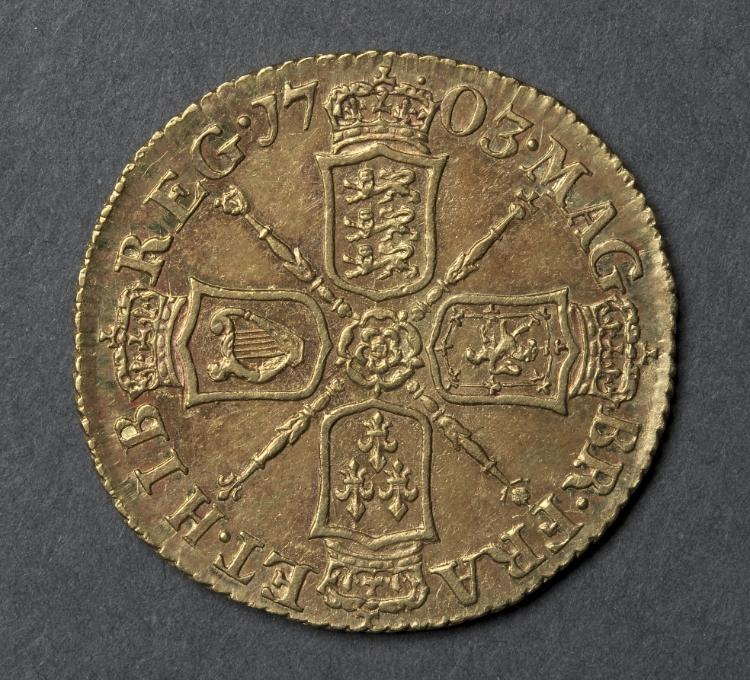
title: Half Guinea: Shields with Rose (reverse)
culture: England, Anne, 1702-1714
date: 1703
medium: gold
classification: Coins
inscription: MAG BR. FRA ET. HIB REG 1703